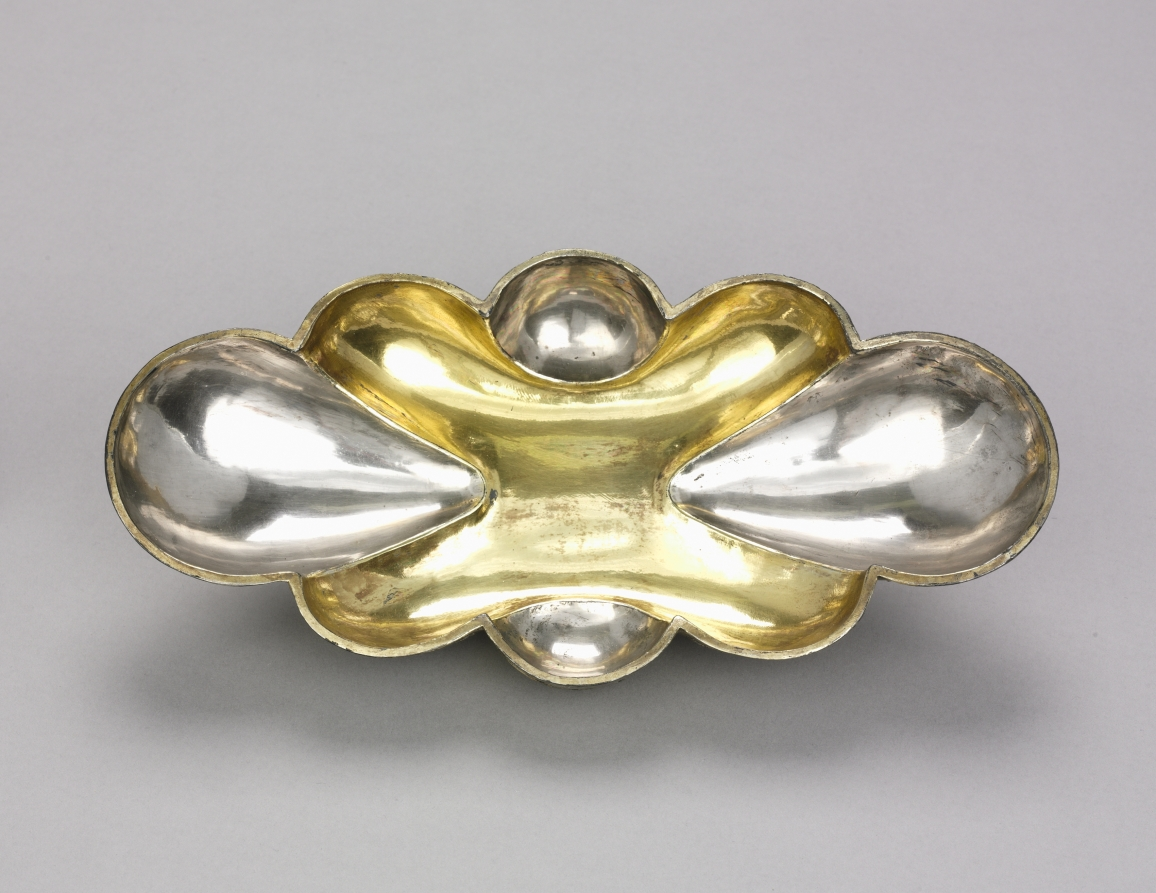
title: Bowl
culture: Iran, Sasanian Empire (224–651 CE)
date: 300–500 CE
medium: silver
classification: Metalwork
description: The decoration on this bowl—a vine with a little nude, accompanied by musicians drinking wine from a rhyton—is related to the Hellenistic cult of Dionysos, or Bacchus, which was brought to Iran by the Greeks and became absorbed into the cult of Anahita.